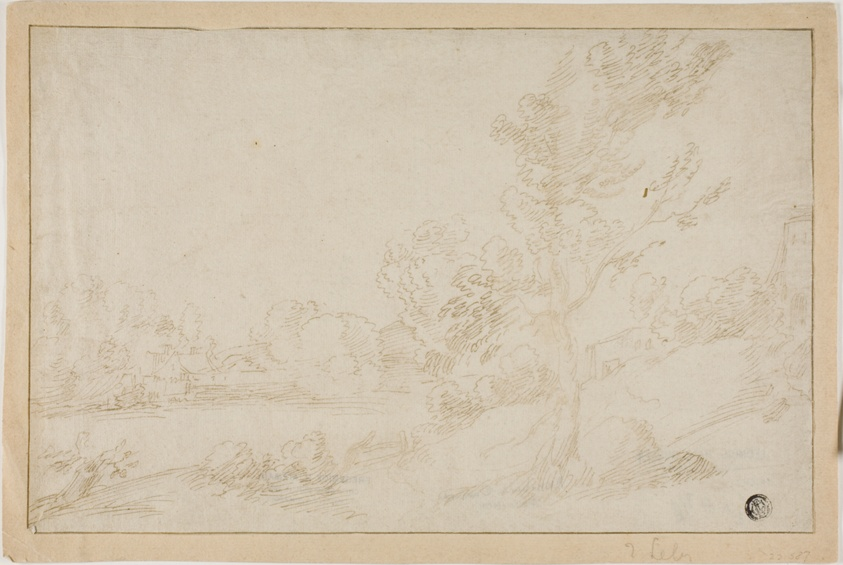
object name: Drawing and Watercolor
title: Landscape with River Bank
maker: Possibly Annibale Carracci; Italian, 1560-1609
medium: Pen and brown ink on ivory laid paper, tipped onto tan laid paper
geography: Italy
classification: pen and ink drawings; paper; drawings (visual works); prints and drawing